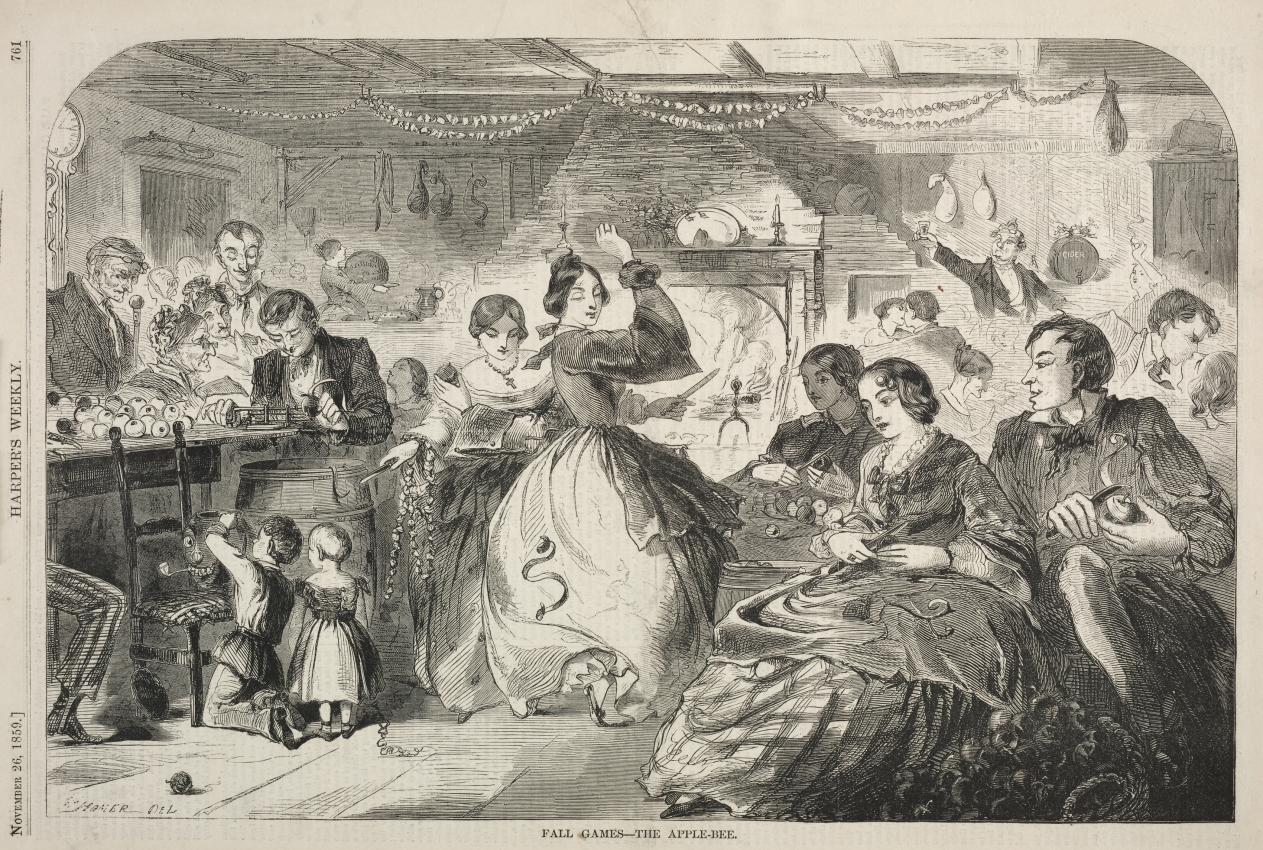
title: Fall Games - The Apple Bee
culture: America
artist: Winslow Homer (American, 1836–1910)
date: 1859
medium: wood engraving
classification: Print